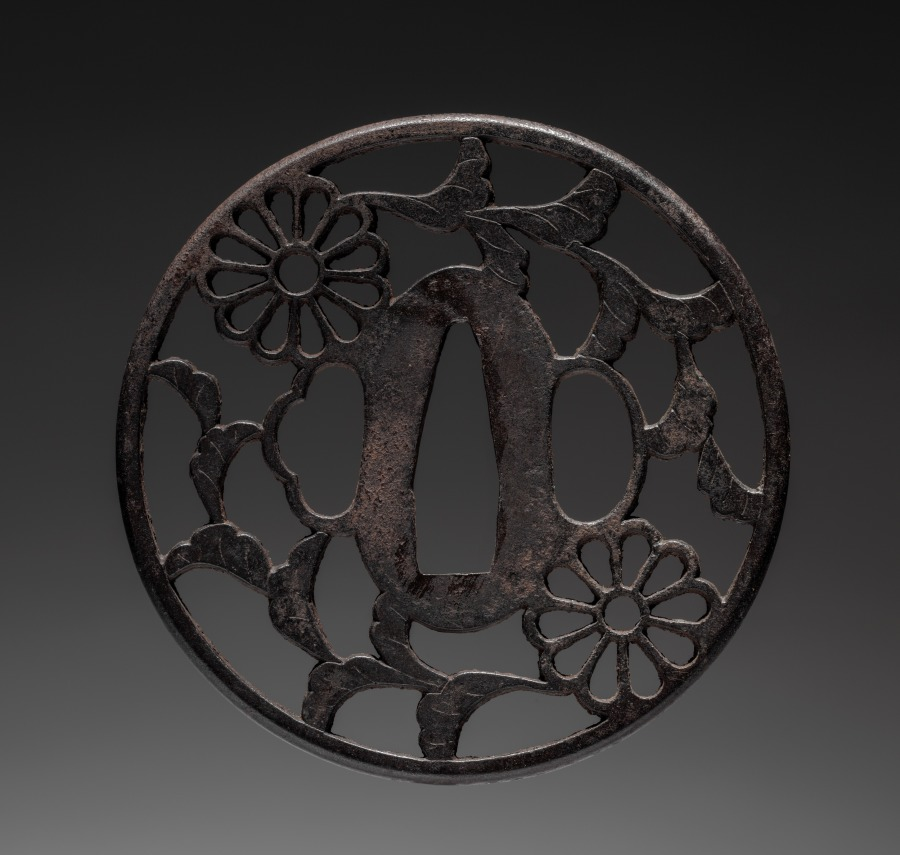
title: Sword Guard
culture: Japan, Edo period (1615–1868)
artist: Kuniyoshi (Japanese)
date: late 1600s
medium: iron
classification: Arms and Armor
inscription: Signature: Kuniyoshi, residing in Iwami province, made